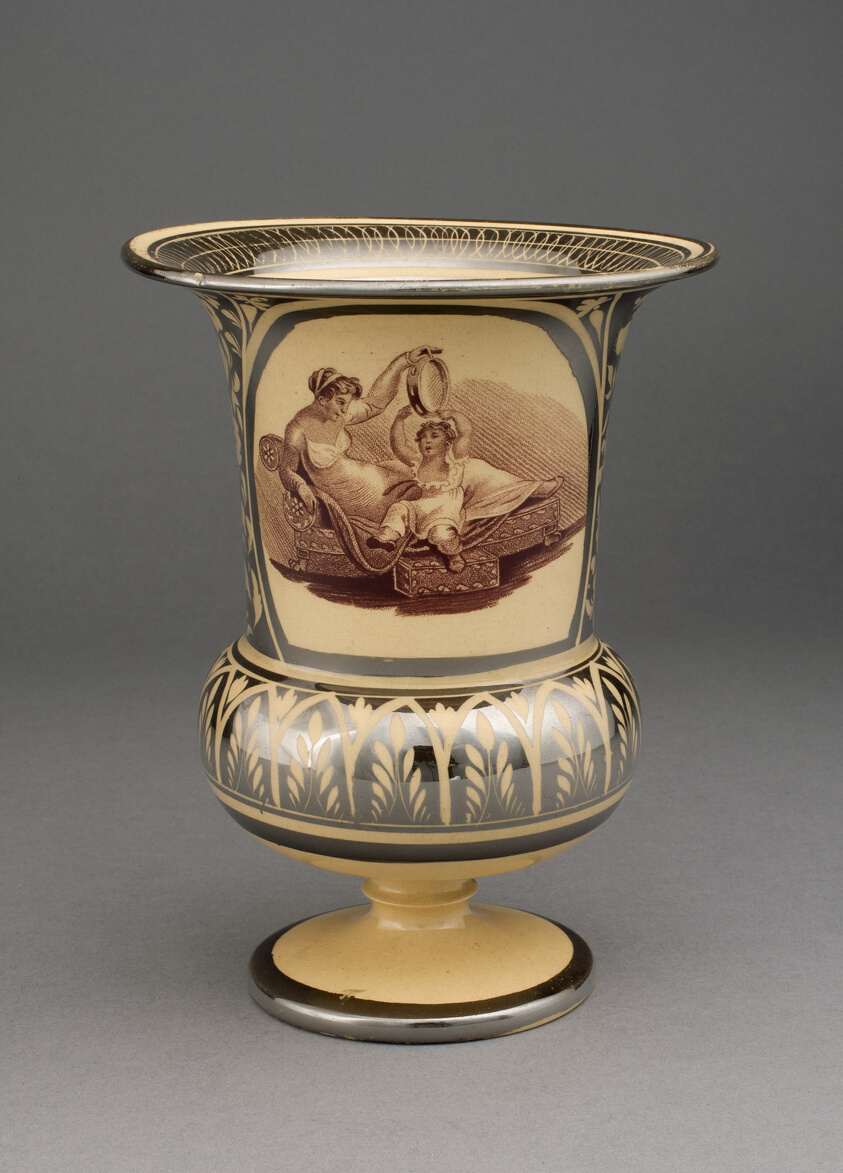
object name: Ceramics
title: Vase (part of a Garniture of 5 Vases)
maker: England, Leeds; With Transfer Decoration after Adam Buck; Irish, 1759-1833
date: c. 1820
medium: Earthenware with silver lustre decoration, monochrome brown, and yellow ground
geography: Leeds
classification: vase; earthenware; vessel; european decorative arts; ceramics